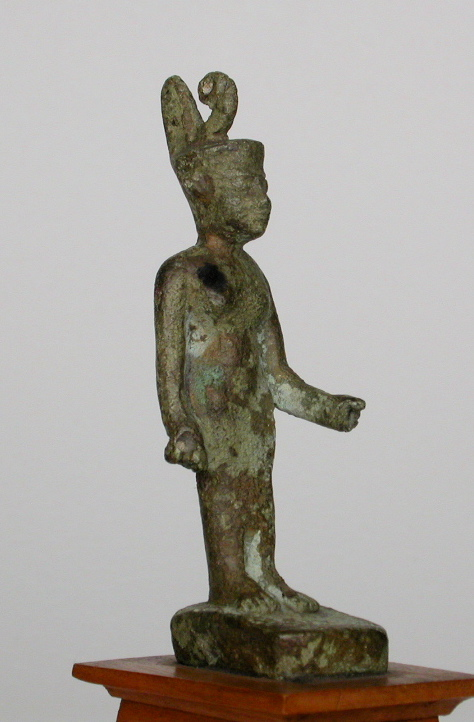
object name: Sculpture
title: Statuette of the Goddess Neith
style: third intermediate period, egyptian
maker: Egyptian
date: Third Intermediate Period, Dynasty 21–25 (about 1069–664 BCE)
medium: Bronze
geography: Egypt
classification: statuette; bronze; metal; sculpture; ancient art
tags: goddesses